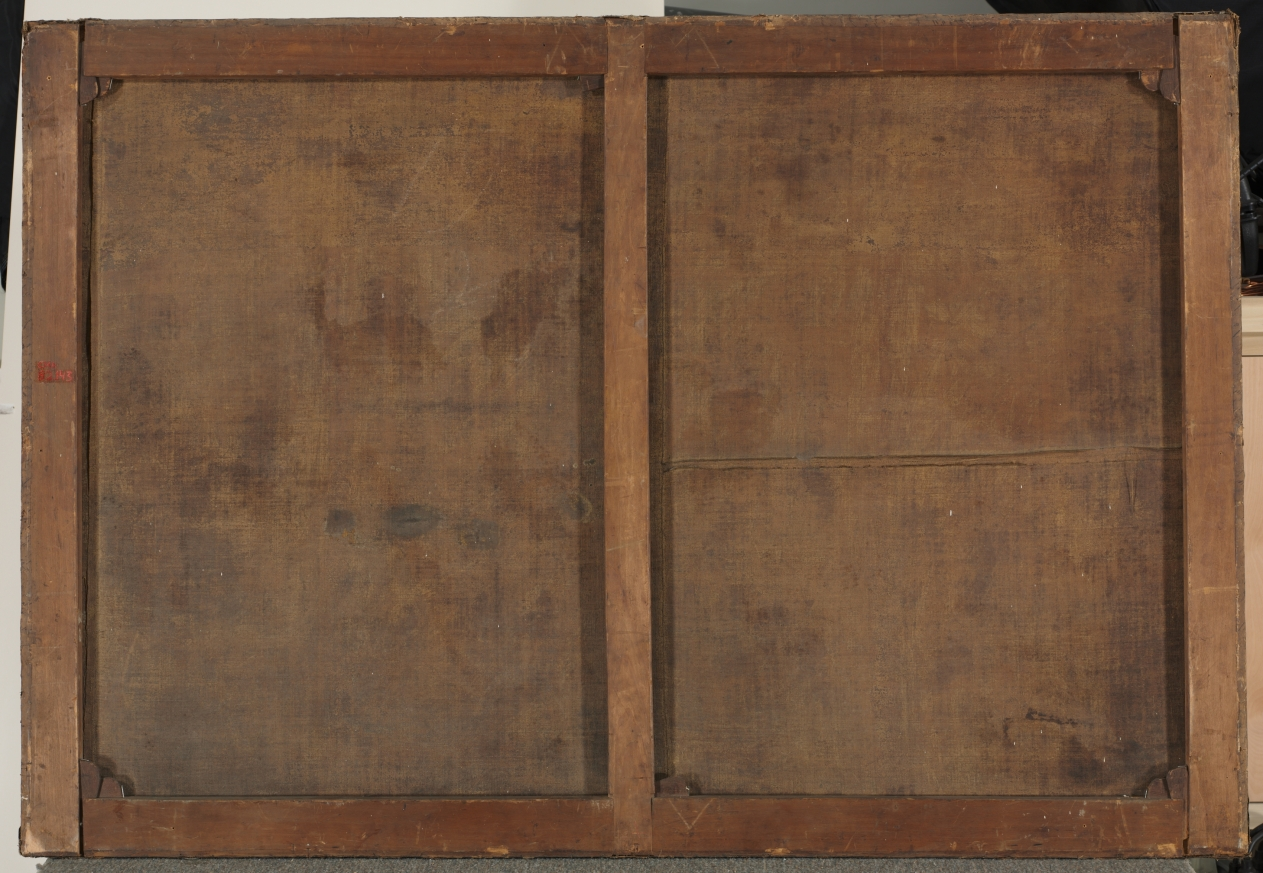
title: Abduction of the Sabine Women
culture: Germany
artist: Johann Heinrich Schönfeld (German, 1609–1684)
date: c. 1640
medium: oil on canvas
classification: Painting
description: Shortly after Rome was founded, the Romans abducted the women of the neighboring Sabines to be their wives. During the ensuing war, the Sabine women intervened, making peace between the two sides. Painted in Naples, this canvas seems to be the last of four versions of the subject painted by Johann Schönfeld (two in the Hermitage, St. Petersburg, another in a private collection).